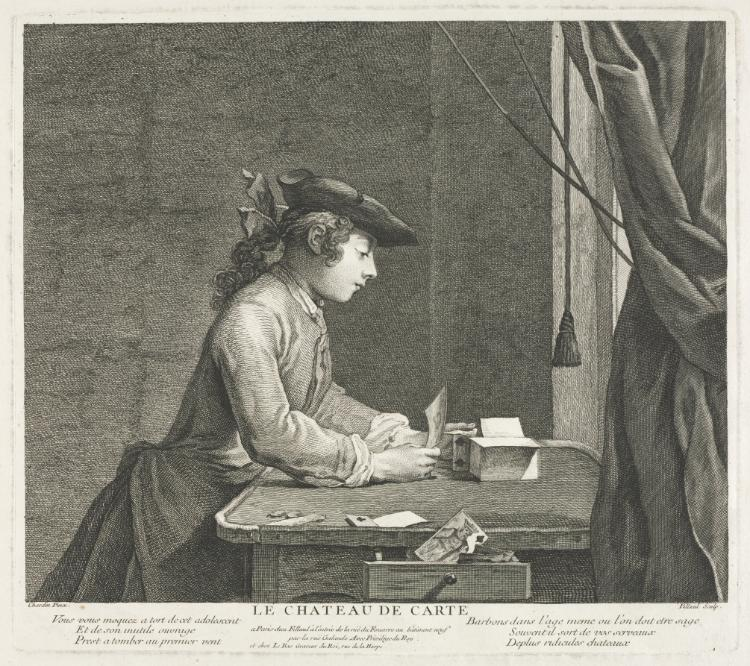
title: House of Cards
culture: France, 18th century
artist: Pierre Filloeuil (French, 1696–after 1734)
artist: after Jean-Siméon Chardin (French, 1699–1779)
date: c. 1737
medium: engraving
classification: Print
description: Chardin's (1699-1779) quiet picture of a boy studiously balancing cards is one of several paintings in which he depicted children or adolescents absorbed in thoughtful play or study. The rhyme at the bottom of the print comments on the resemblance between childhood and adult realms: You are wrong to make fun of this adolescent And of his useless amusement Ready at first breeze to capsize We are bored even at the age we should be wise Out of our brains there often blow The most ridiculous châteaus.